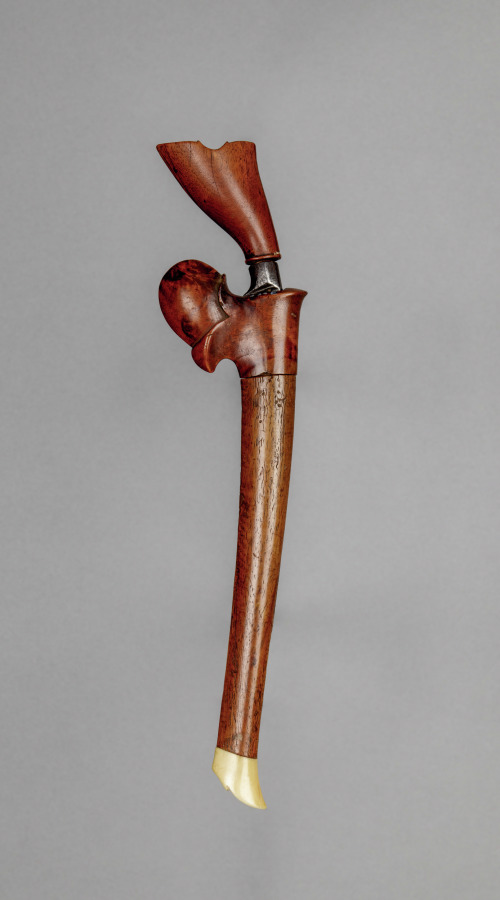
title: Knife (Kris) and Wood Scabbard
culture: Indonesia or Malaysia, Early 20th century (?)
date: c 1900– 1925 ?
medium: metal, wood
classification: Arms and Armor